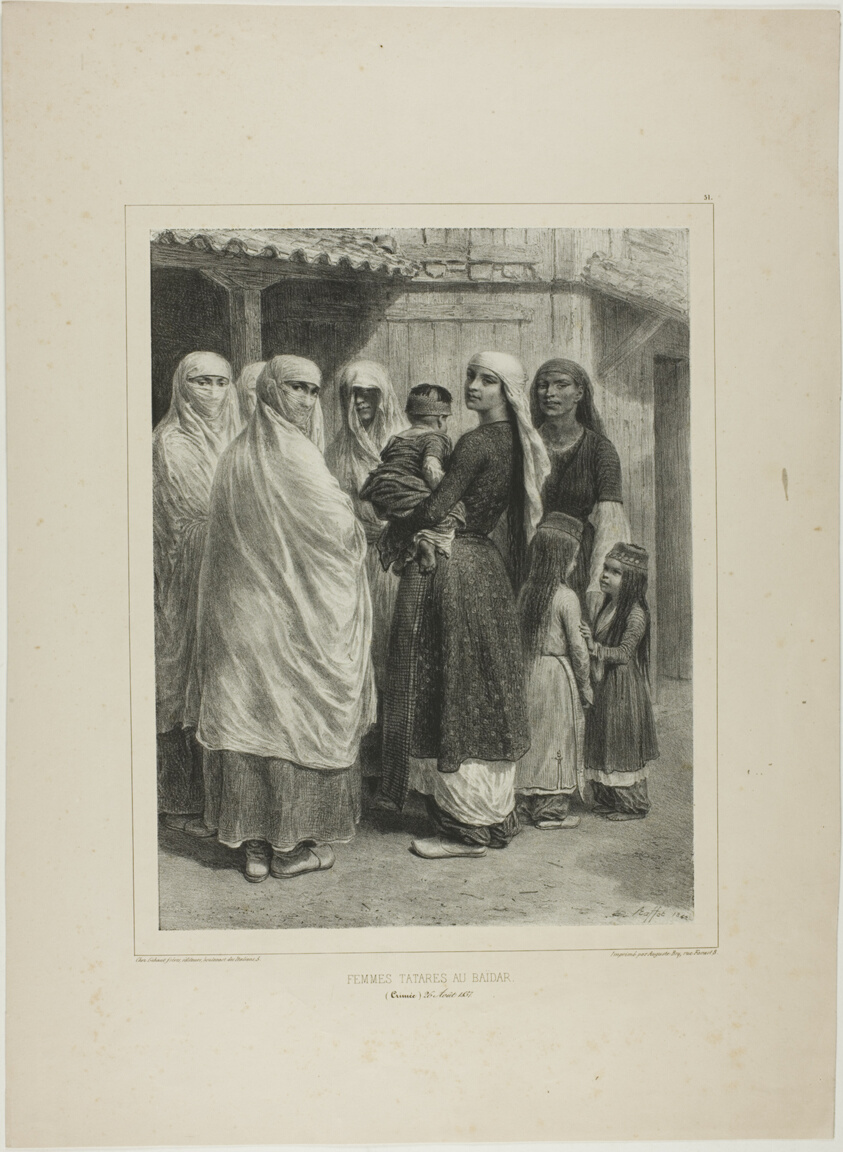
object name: Print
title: Tartar Women at the Baïdar, Crimea, August 26, 1837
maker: Denis Auguste Marie Raffet (French, 1804-1860); printed by Auguste Bry (French, 19th century); published by Chez Gihaut Frères (French, 19th century)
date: 1842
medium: Lithograph in black on grayish-ivory chine laid down on buff wove paper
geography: France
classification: lithograph; print; prints and drawing